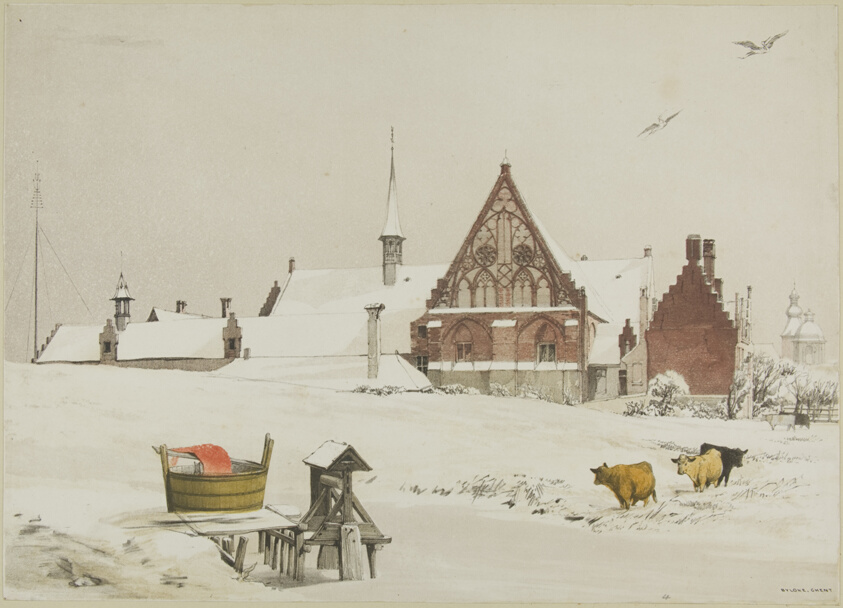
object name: Print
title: Byloke, Ghent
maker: Thomas Shotter Boys (English, 1803-1874); published by Charles Joseph Hullmandel (English, 1789-1850)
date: 1839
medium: Color lithograph on paper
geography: England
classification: lithograph; print; prints and drawing